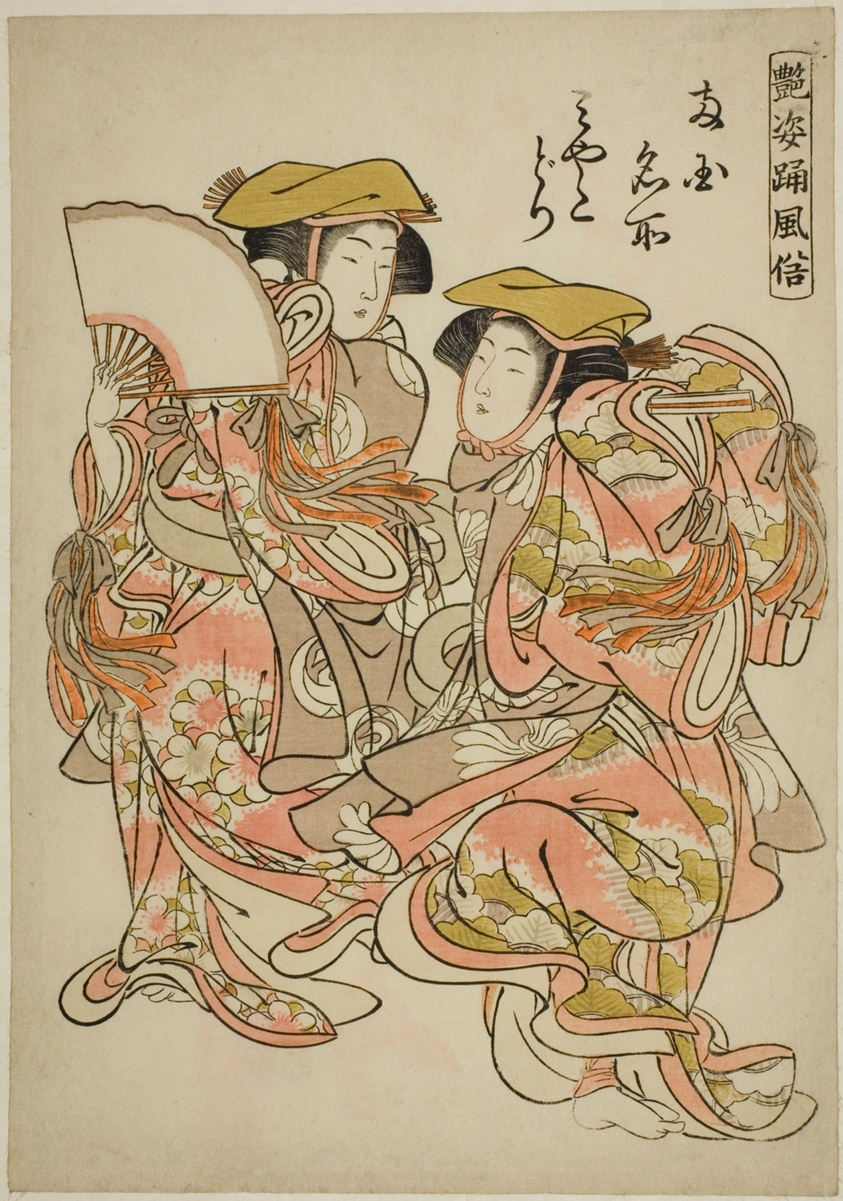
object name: Print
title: The Oystercatcher Dance (Miyakodori), from the series "Beautiful Dance Customs (Adesugata odori fuzoku)"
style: Japanese (culture or style)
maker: Kitao Shigemasa (Japanese, 1739-1820)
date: c. 1778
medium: Color woodblock print; chuban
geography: Japan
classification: woodblock print; print; asian art